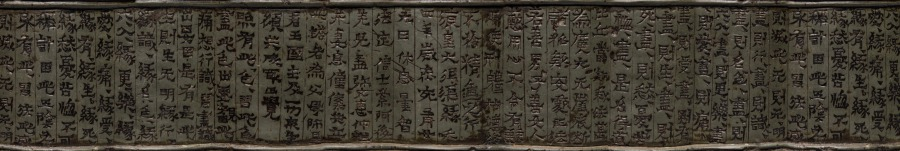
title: Miniature Votive Stupa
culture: China, Gansu province, Northern Wei dynasty (386-534)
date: 435 CE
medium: steatite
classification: Sculpture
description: This sutra pillar, inscribed with a sacred Buddhist text, belongs to a group of miniature stupas (jingta) that were found exclusively in the Gansu corridor, Northwest China. Ranging in date between AD 426–36, some of them bear the names of the lay Buddhist donors who commissioned them. A stupa is an architectural round structure built for the veneration of Buddhist relics. Miniature stupas may have commemorated the visit of a sacred site or represented donations to religious communities and sites.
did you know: There are trigrams, three horizontal lines, broken or continuous, above each of the eight bodhisattvas in the stupa's lower section.